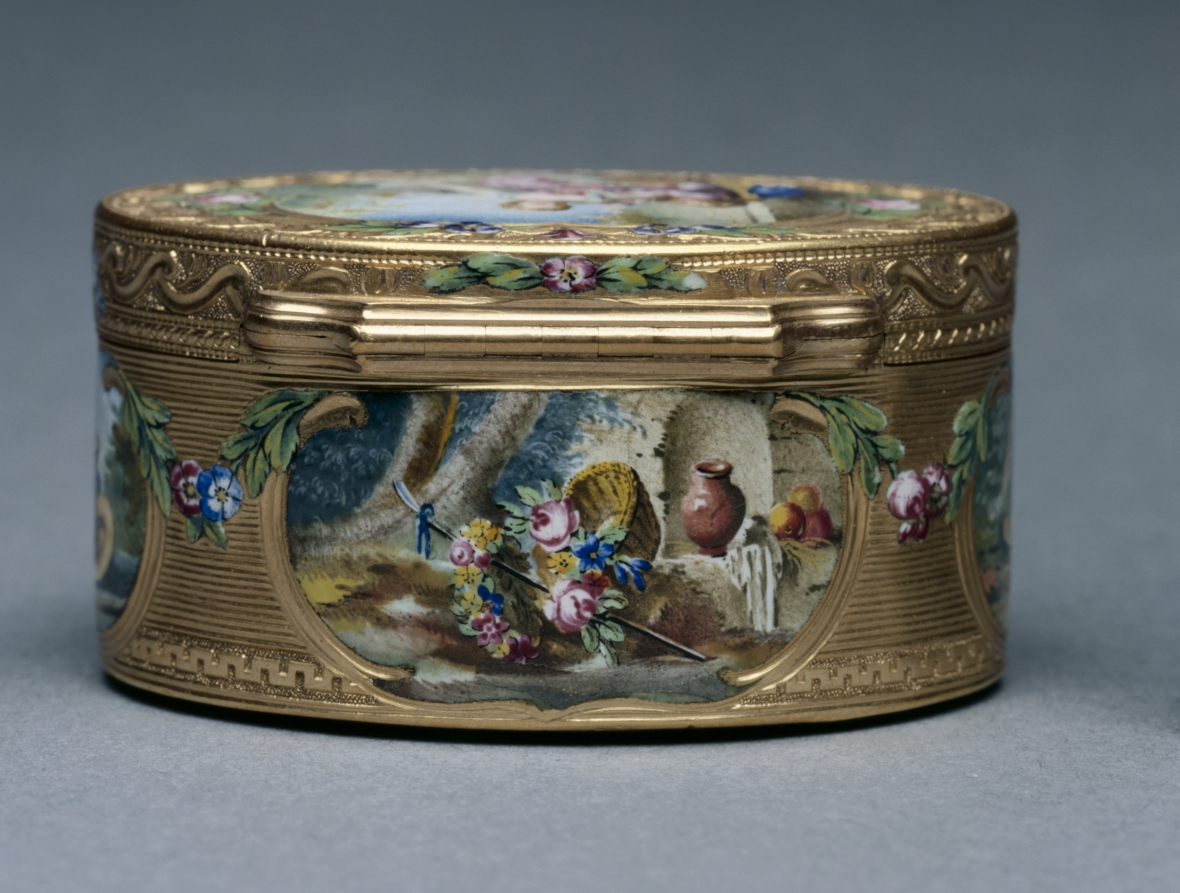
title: Snuff Box (Tabatière)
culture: France, 18th century (style of Louis XV)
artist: Francois Guillaume Tiron (French)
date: 1761–62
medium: gold and enamel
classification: Miscellaneous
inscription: [Maker's mark of Francois-Guillaume Tiron, master goldsmith in 1747, inside cover]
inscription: [Warden's mark, Paris, 1761-1762, inside cover]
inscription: [Charge mark of Eloi Brichard and Etienne Somfoye, Paris, 1756-1762, inside cover]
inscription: [Maker's mark of Francois-Guillaume Tiron, inside bottom]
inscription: [Warden's mark, 1761-1762, inside bottom]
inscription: [Charge mark of Brichard and Somfoye, inside bottom]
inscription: [Maker's mark of FG Tiron, left wall]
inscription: [Charge mark of Brichard and Somfoye, left wall]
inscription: [Warden's mark, Paris, 1761-1762, left wall]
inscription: [Discharge mark of J.J. Prevost, Paris, 1762-1768, bezel at right]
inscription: [Engraved number, maybe retailer's number]: "n. 13676"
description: The pastoral scenes that decorate this box are typical of the style of François Boucher, a celebrated painter of the period whose works were popularly reproduced on decorative arts. Snuff boxes, used practically as containers for powdered tobacco, were often decorated with miniature reproductions of notable works. The miniature on the cover is inspired by Boucher’s The Galant Pastor (Le Pasteur Gallant) (1738) and that on the bottom by The Amusement of the Shepherd Girl (L’Amusement de la Bergère) (1700s).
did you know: François Boucher was a favorite of the French royal court of Louis XV and named first painter of the king in 1765.